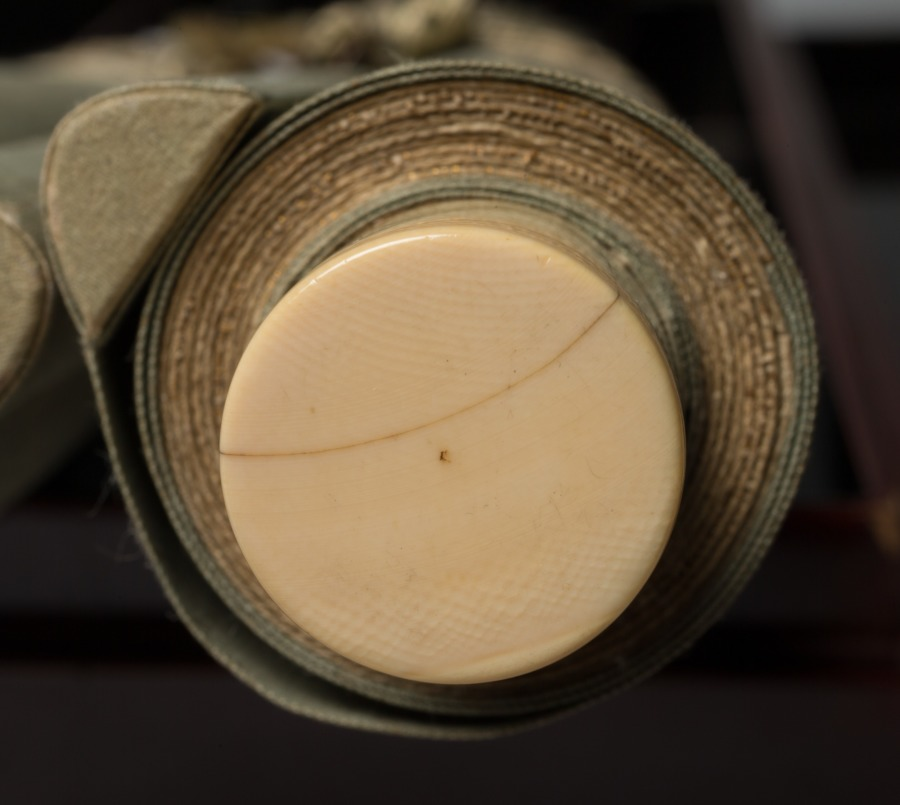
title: Fish and Seaweed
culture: Japan, Momoyama period (1573–1615)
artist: Rinkyo (Japanese)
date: 1573–1615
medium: one of a pair of hanging scrolls; ink on paper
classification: Painting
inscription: artist's seal at mid-right edge of painting.